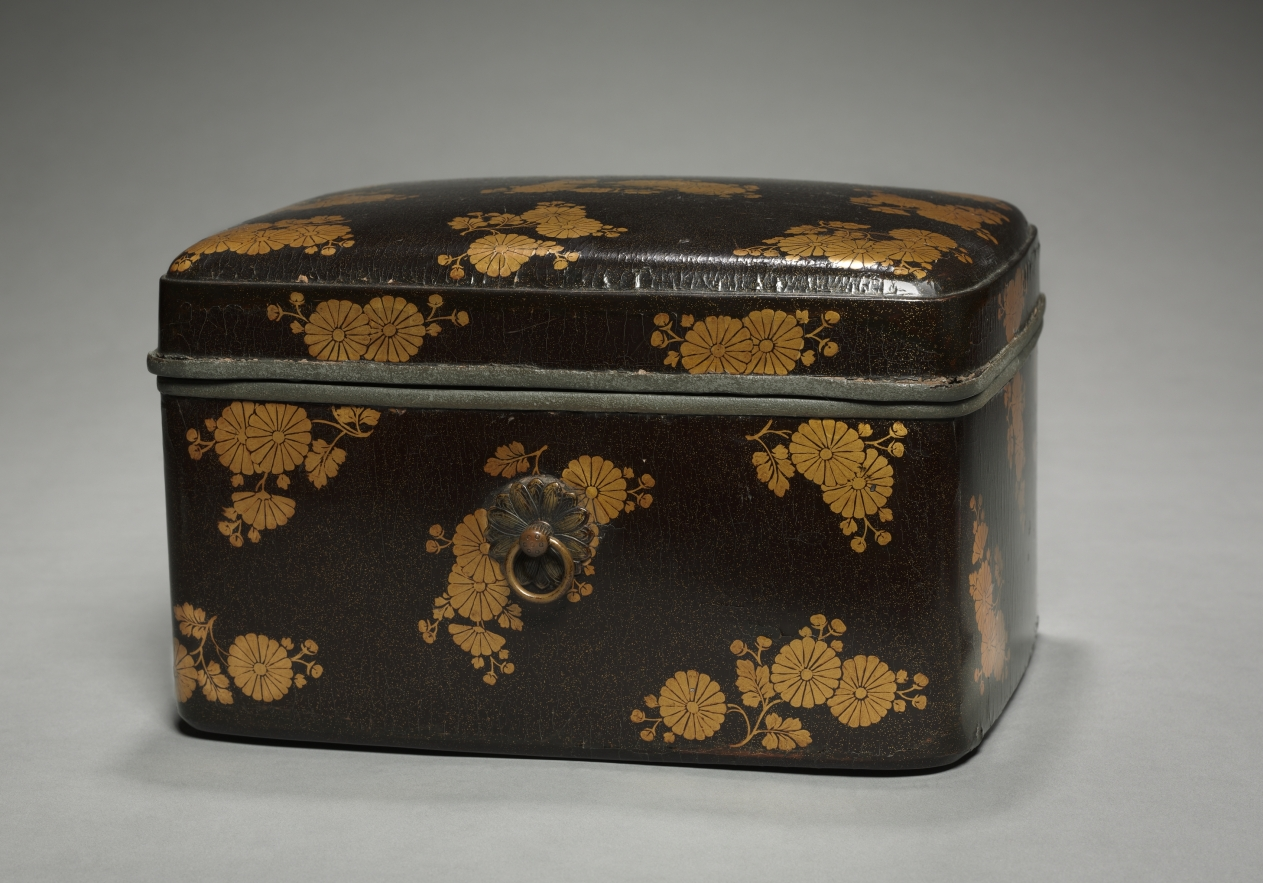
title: Cosmetics Box with Chrysanthemums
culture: Japan, Kamakura period (1185–1333)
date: early 1300s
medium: lacquer on wood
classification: Lacquer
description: In China, the chrysanthemum was historically appreciated for its association with the Double Nine Festival and the reclusive life of the poet Tao Yuanming (AD 365-427). In Japan, the 16-petaled chrysanthemum came to symbolize the Japanese imperial family after Emperor Gotoba (1180-1239) chose the motif as his personal emblem, having it applied to his sword and everyday utensils. This box proves that the flower also appeared on lacquer wares as early as the Kamakura period.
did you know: In Japanese, this type of small box is called a tebako, literally a hand box, and was typically part of a cosmetics set.